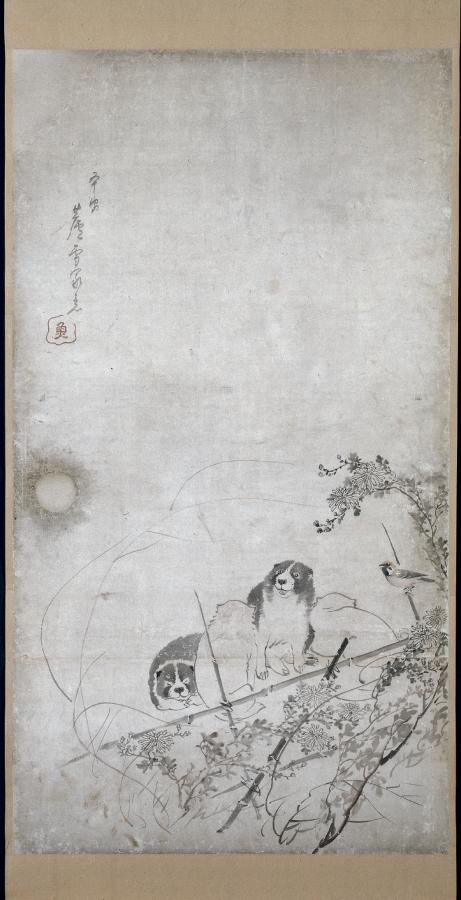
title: Puppies, Sparrows, and Chrysanthemums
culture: Japan, Edo period (1615–1868)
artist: Nagasawa Rosetsu (Japanese, 1754–1799)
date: c. 1792–94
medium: Fusuma panel remounted as a hanging scroll; ink and slight color on paper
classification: Painting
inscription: Signature and seal of artist upper left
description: These paintings were originally mounted as sliding doors (fusuma) used inside a building. The circular areas on the paintings’ paper surfaces are traces of the former positions of the door pulls (hikite). A flock of sparrows gathers on a trellis supporting flowering chrysanthemum. Below is a litter of puppies, some cavorting, others napping. The tender story created by the curious puppy peering up and tilting its head to listen to the bird’s insistent call in the leftmost part of the composition is characteristic of Nagasawa Rosetsu’s paintings, which often use animals to illustrate the human condition.